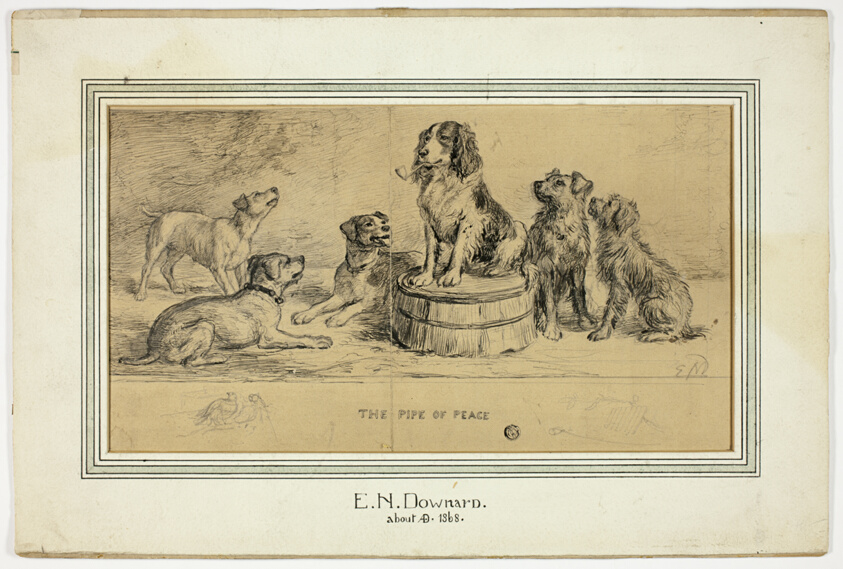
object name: Drawing and Watercolor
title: The Pipe of Peace (recto); Sketch of Village Street (verso)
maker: Ebeneezer Newman Downard; English, 1829-1894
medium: Pen and black ink, over graphite (recto), and graphite (verso) on tan wove paper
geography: England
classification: pen and ink drawings; paper; drawings (visual works); prints and drawing